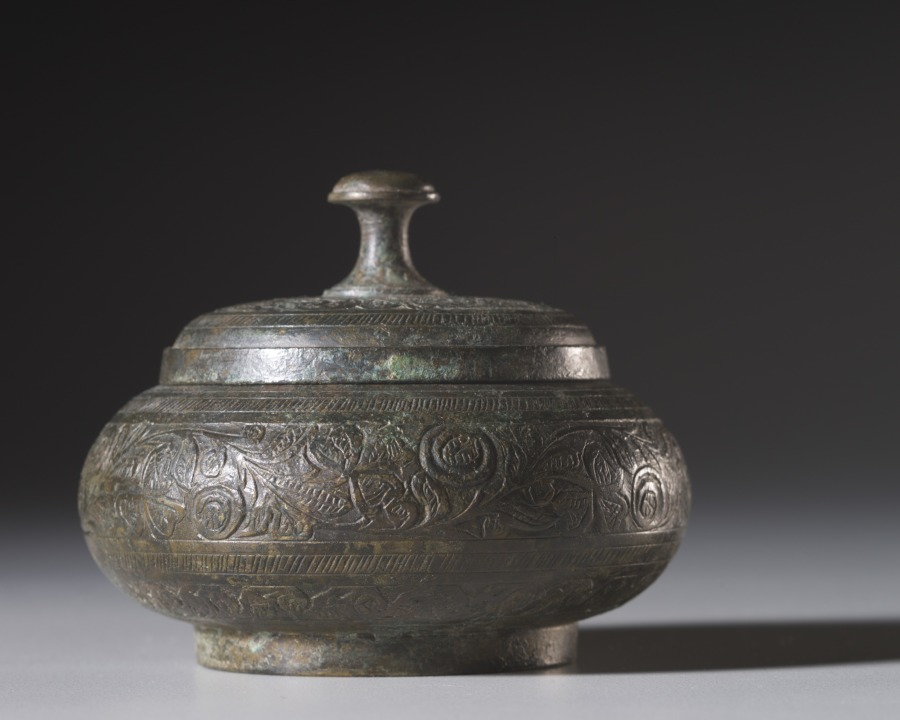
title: Reliquary Box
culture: Pakistan, Gandhara, probably Swat, late Kushan period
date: 200–400 CE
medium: bronze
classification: Metalwork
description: This casket in bronze represents the great variety of reliquary caskets. It is round, has a low foot, and is covered with a lid (with raised handle) that fits over the vessel rather than being inset. It is a traditional shape frequently encountered in Gandharan reliquaries, but its slight flattening and elaborate decoration imply a slightly late date. A central band of a floral creeper decorates the main body of the box and its lid, and is framed on both sides by narrower fluted bands. This type of freehand design is characteristic of the late Kusana-early Gupta period. Similar floral patterns are found in another CMA object (1972.164), the lid of a box showing combat between a man and a lion, which also dates to a later period. There the design fills the vacant areas in the busy composition. This pattern, however, has its antecedents in the Begram ivories . which, according to most sources, pre-date the Sasanian invasion of the mid-third century AD. Therefore, it can be assumed that this type of floral decoration was already in use in the third century and that this reliquary box probably dates to the third-fourth century AD. The bronze alloy, in its somewhat silverish-metallic appearance, seems to be very close to the material used in the Swat bronzes, which suggests that Swat may also be the provenance for this reliquary.